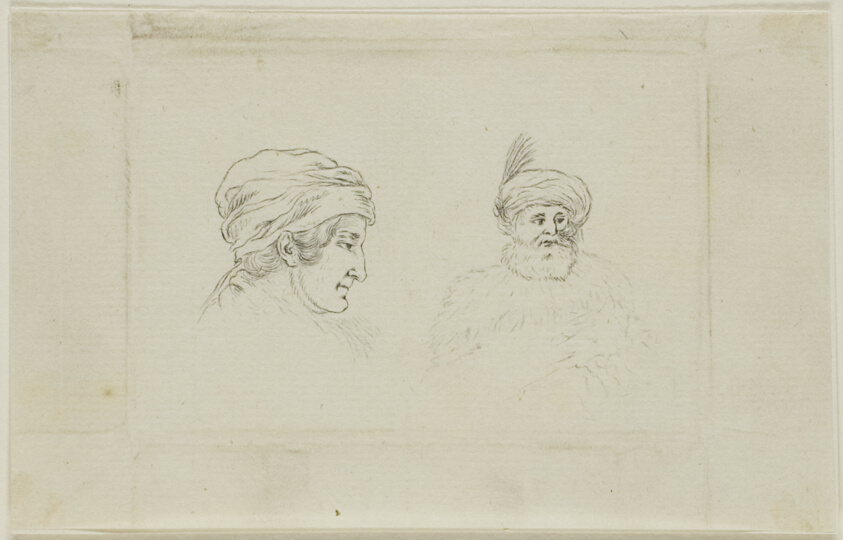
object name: Print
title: Caprice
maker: Jean-Baptiste de Grateloup (French, 1735-1817); Jean Pierre Sylvestre (French)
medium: Etching on paper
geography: France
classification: etching; print; prints and drawing